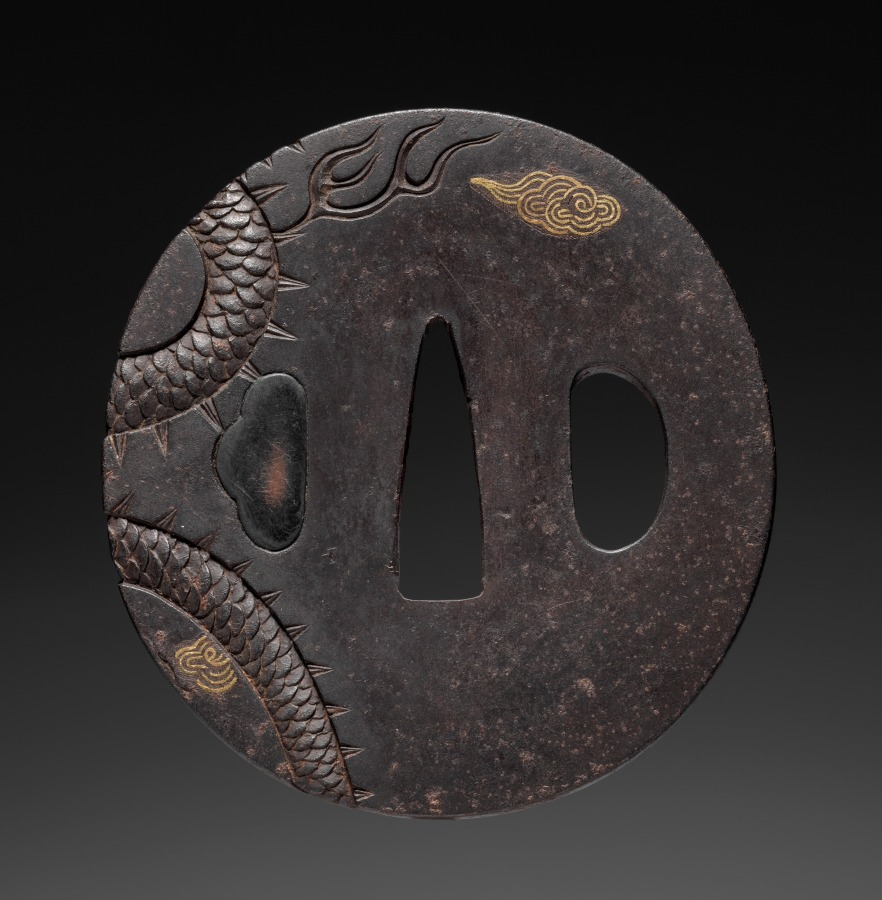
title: Sword Guard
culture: Japan, Edo period (1615–1868)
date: early 1800s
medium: iron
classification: Arms and Armor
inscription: Signature: Seiryuken Hisanaga (or Eiju, and seal) Sei-si.